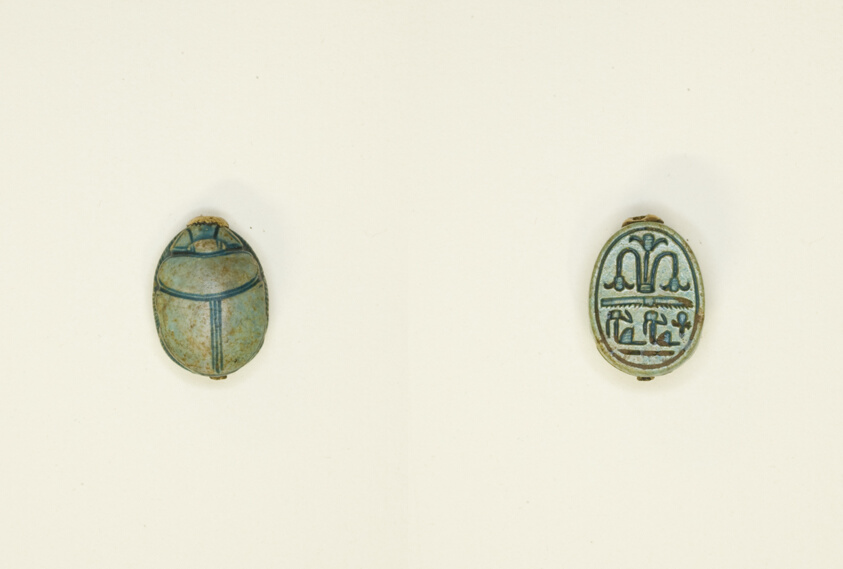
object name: Costume and Accessories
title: Scarab: Floral Motif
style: middle kingdom, ancient, egyptian, second intermediate period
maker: Egyptian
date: Middle Kingdom–Second Intermediate Period, Dynasties 12–17 (about 2055–1550 BCE)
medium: Glazed steatite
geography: Egypt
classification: scarab; ancient art; costume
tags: Hieroglyphs, floral motifs, insects, people